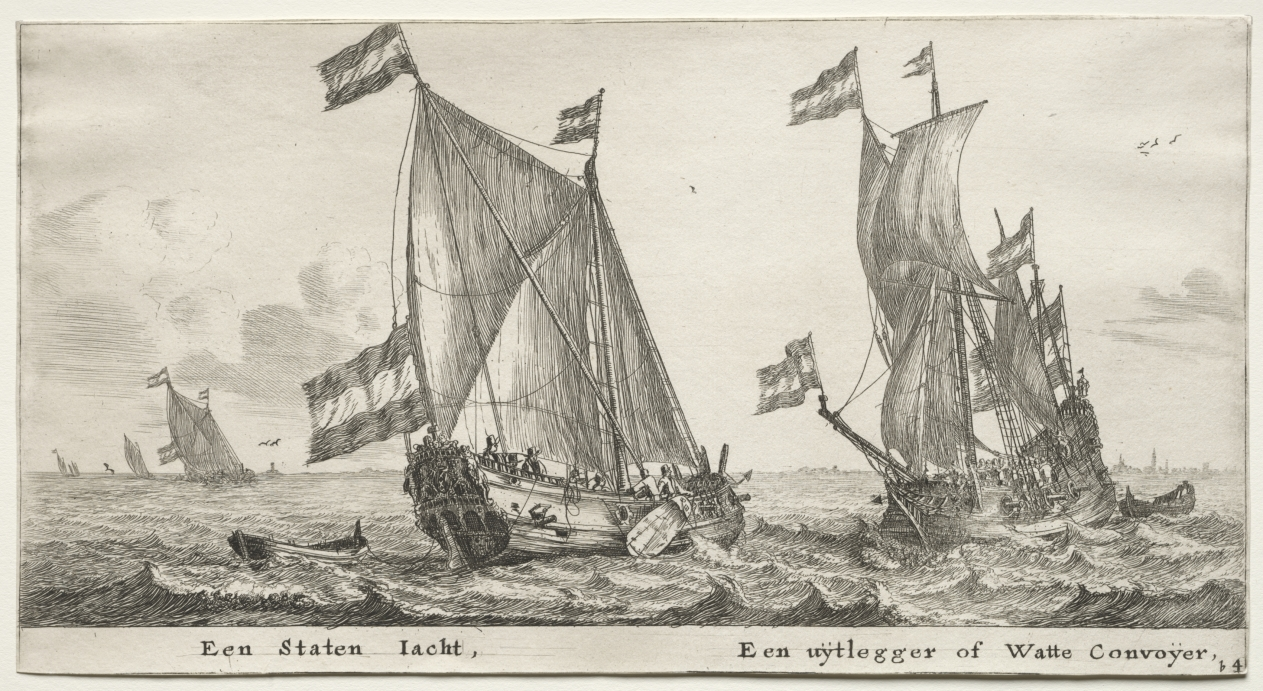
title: Various Ships and Views of Amsterdam (Verscheÿde Schepen en Gesichten van Amstelredam), Part II: Dutch Admiralty Yacht. A Guard Ship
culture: Netherlands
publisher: Clement de Jonghe (Dutch, 1579–1679)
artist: Reinier Nooms, called Zeeman (Dutch, c. 1623–1664)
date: 1652–54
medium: etching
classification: Print